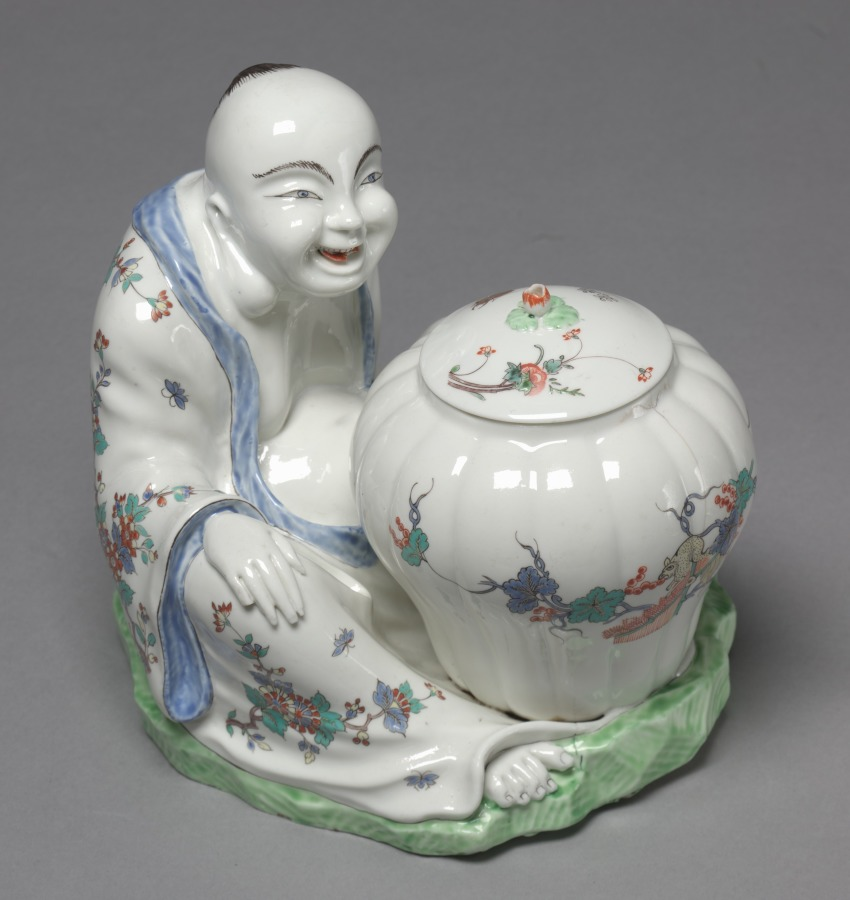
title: Figure of Budai or Hotei with Jar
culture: France, Chantilly, 18th century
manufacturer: Chantilly Porcelain Factory (French)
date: c. 1735–40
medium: Tin-glazed soft-paste porcelain with enamel decoration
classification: Ceramic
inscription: [Mark of the Chantilly factory (red hunting horn), on bottom]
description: The production of decorative figures like this one, referred to as magots or pagodes in European texts, was the result of an 18th-century European interest in Chinese and Japanese culture and porcelain. Budai, pronounced Hotei in Japanese, was a semilegendary Chinese monk known in Japan through the transmission of Chan Bhuddism. This figure’s decoration with multicolor overglaze enamels on a milky-white is typical of Japanese Kakiemon style.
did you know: In 1735, the Chantilly factory was given a 25-year royal privilege for the manufacture of objects that imitated Japanese porcelain.